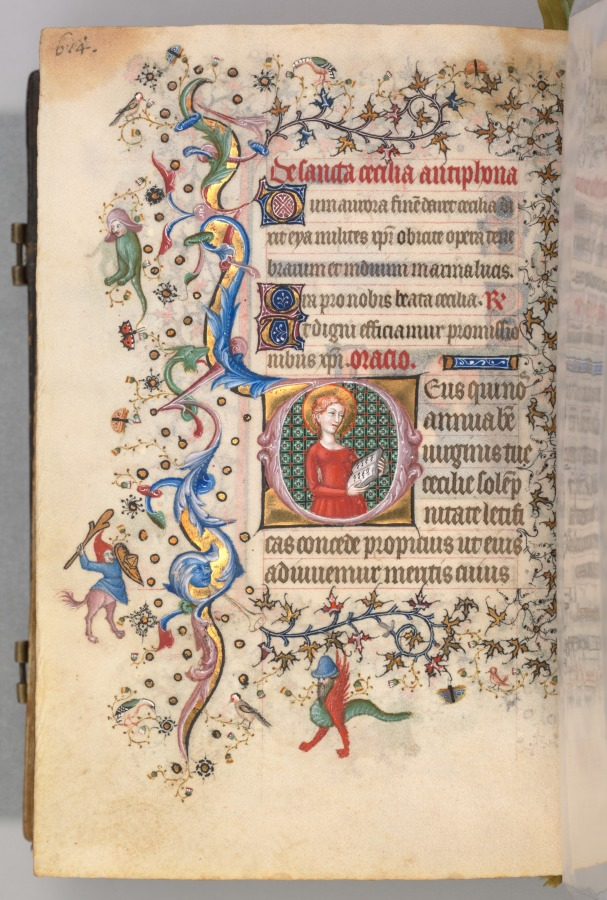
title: Hours of Charles the Noble, King of Navarre (1361-1425): fol. 301v, St. Cecilia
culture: France, Paris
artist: Master of the Brussels Initials and Associates (French)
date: c. 1405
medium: ink, tempera, and gold on vellum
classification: Bound Volume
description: This precious volume was obviously highly prized by its owner, the French-born King of Navarre, who had his coat of arms painted on no less than twenty folios. Rather than directly commissioning this manuscript from a specific workshop, it seems that Charles the Noble acquired his book of hours -- perhaps ready-made for the luxury market -- while on a trip to Paris in 1404-05. A collaborative effort, six painting styles are evidenced within the pages of this codex, those of two Italians, two Frenchmen, and two Netherlanders. The painter who was responsible for the planning and decoration of the book, and who produced seventeen of the large miniatures, was a Bolognese artist known as the Master of the Brussels Initials. His principal assistant, responsible for most of the borders, was a Florentine who signed his name "Zecho" da Firenze on folio 208 verso.